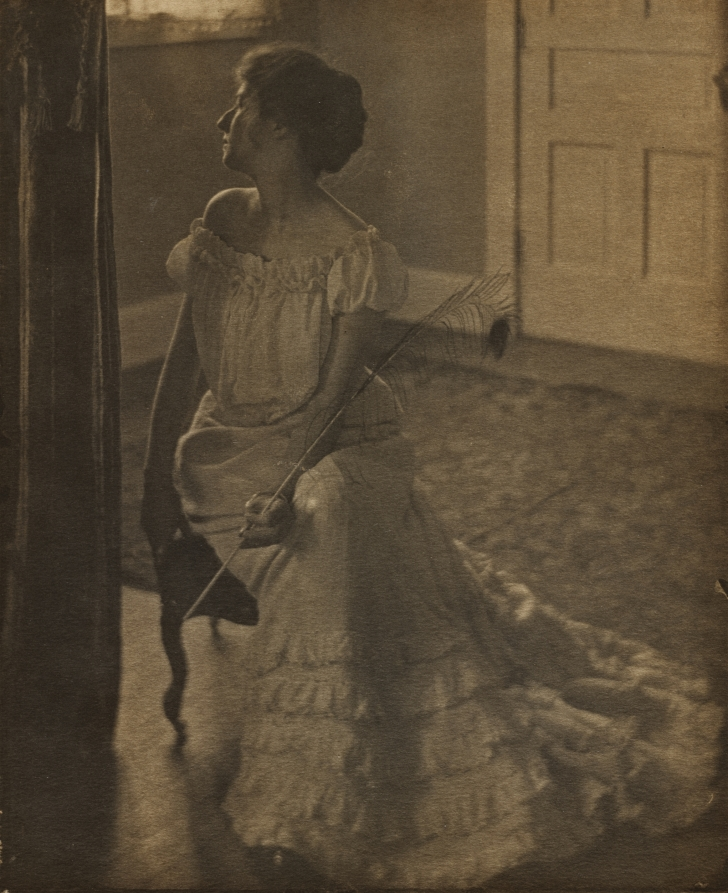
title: The Peacock Feather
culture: America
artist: Clarence H. White (American, 1871–1925)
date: c. 1902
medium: platinum print with gouache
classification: Photograph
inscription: Written in pencil on verso: "38 [circled]"; "Julia H. McCune / by Clarence H. White / about 1902?"